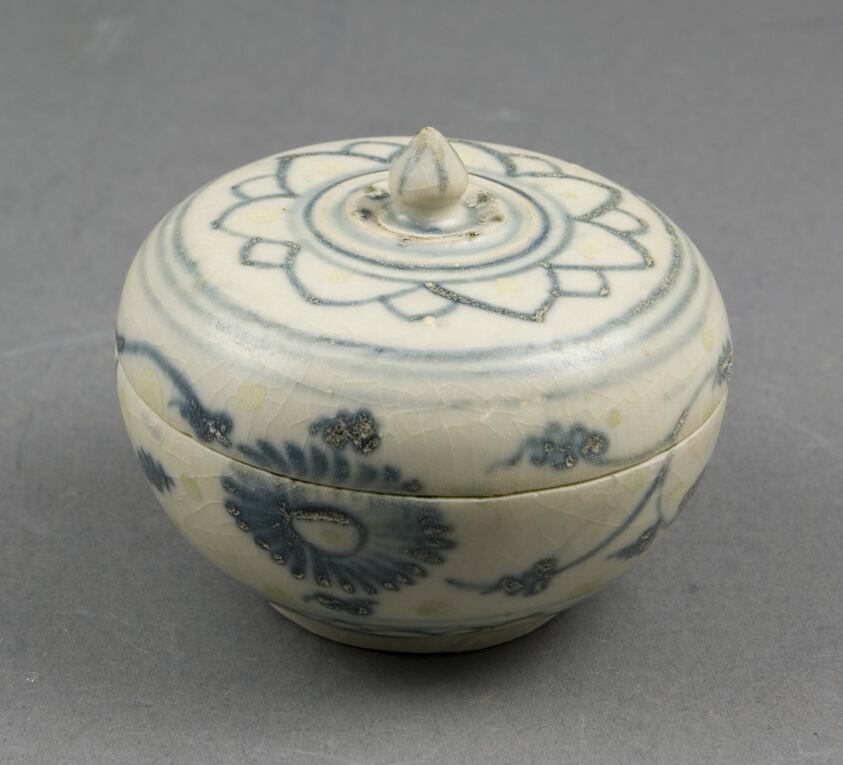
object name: Ceramics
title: Covered Box with Lotus Bud Knob and Lotus Flower Motif on Lid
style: annamese, vietnamese, Southeast Asian, asian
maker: Vietnam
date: 15th century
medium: Glazed stoneware with cobalt-blue underglaze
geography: Vietnam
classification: ceramics; asian art